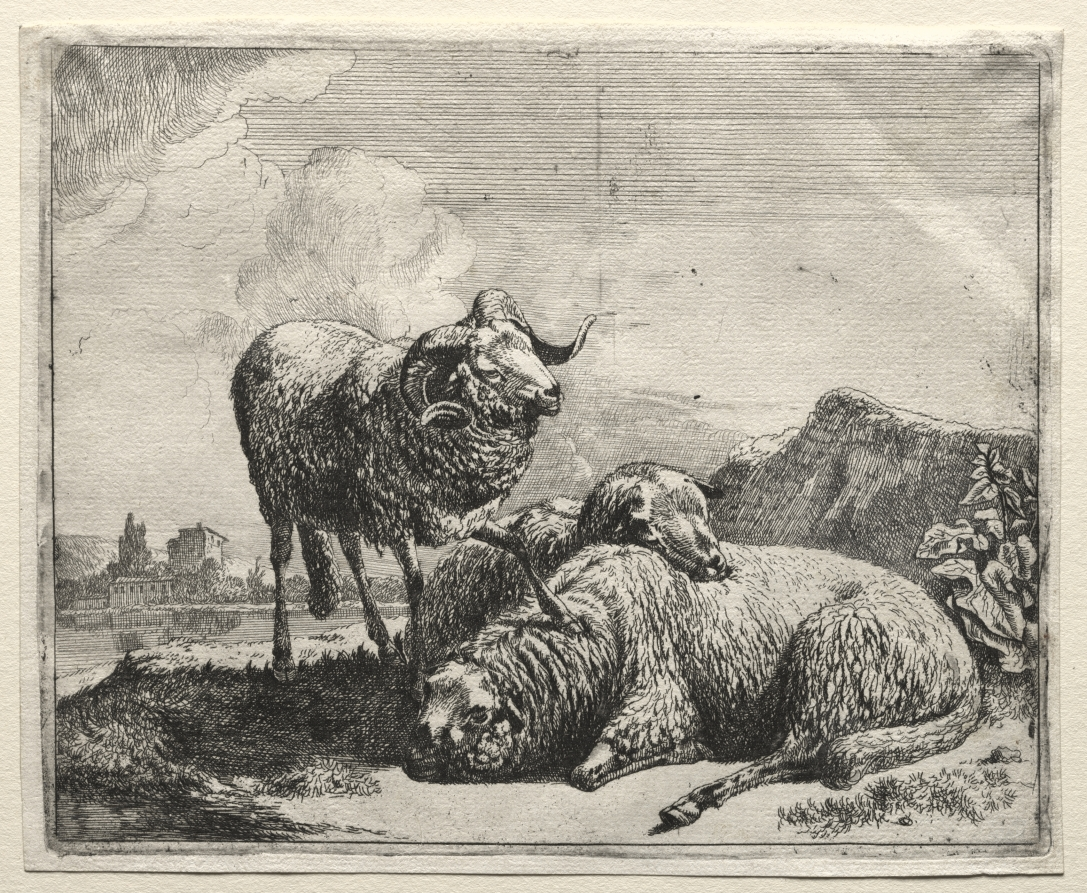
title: Ram and Two Sheep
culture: Germany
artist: Johann Heinrich Roos (German, 1631–1685)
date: 1665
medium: etching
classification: Print